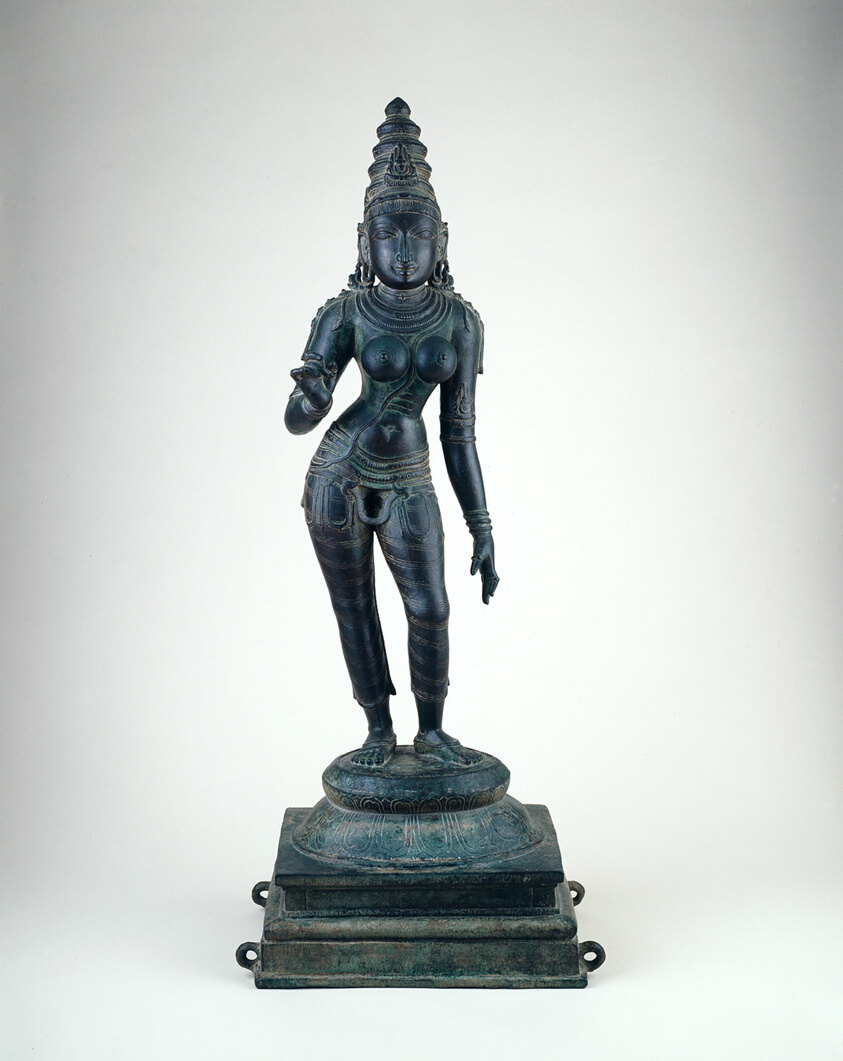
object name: Sculpture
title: Goddess Uma, Consort of Shiva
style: South Asian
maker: India; Tamil Nadu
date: Vijayanagar period, about 1500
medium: Bronze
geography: Tamil Nadu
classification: bronze; metal; sculpture; asian art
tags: goddesses